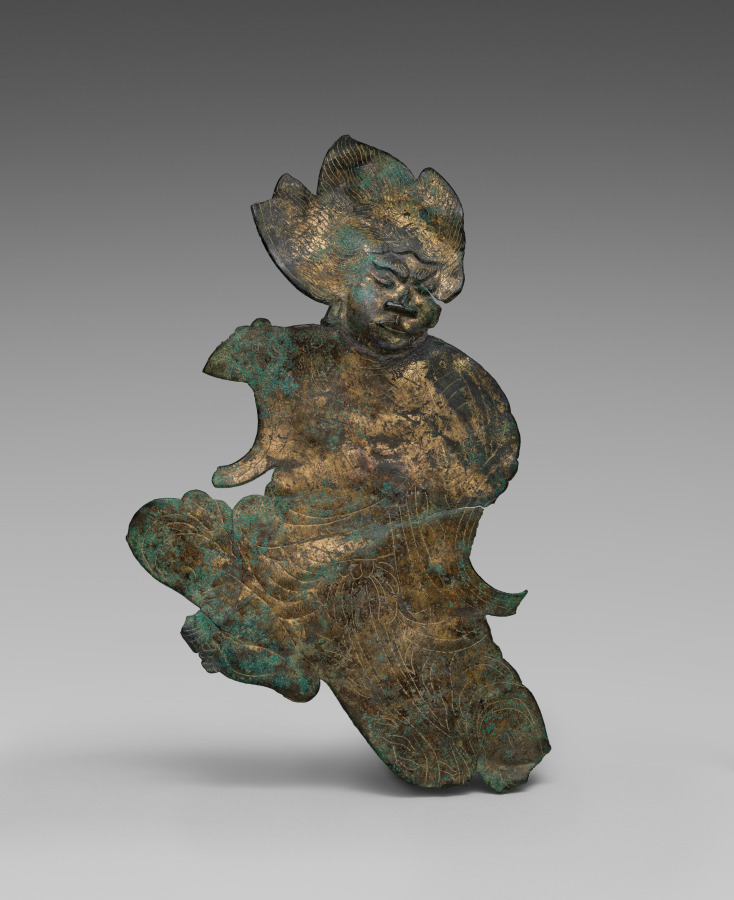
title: Zaō Gongen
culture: Japan, Heian period (794–1185)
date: 1100s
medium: Gilt bronze with repoussé and incised details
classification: Metalwork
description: Zaō Gongen is the deity of Mount Kinpu, in the Yoshino Mountains south of Nara. This fragment is from a votive mirror called a kakebotoke with metal fittings at the top through which a cord could be used to hang it.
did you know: This votive mirror would have been hung in a temple or shrine.